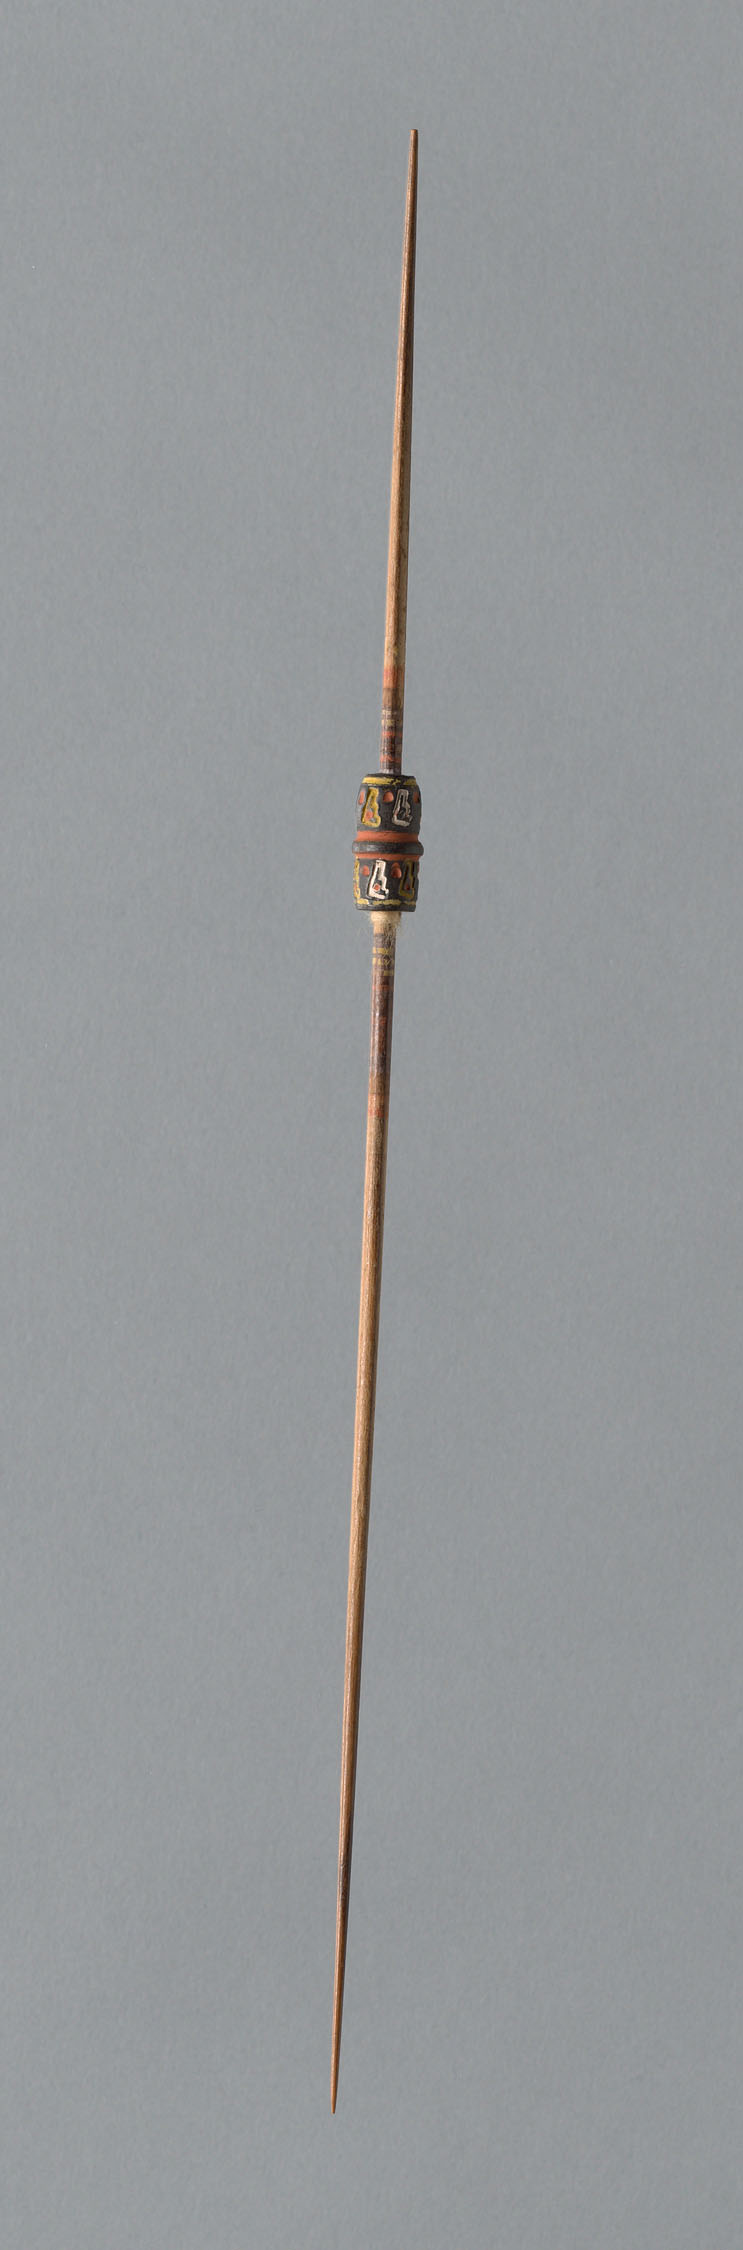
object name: non-art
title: Wooden Spindle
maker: Peru, Possibly central coast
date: 1000/1476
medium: Wood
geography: Peru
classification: spindles (textile working equipment); textile working equipment; accessories (object genre); textile